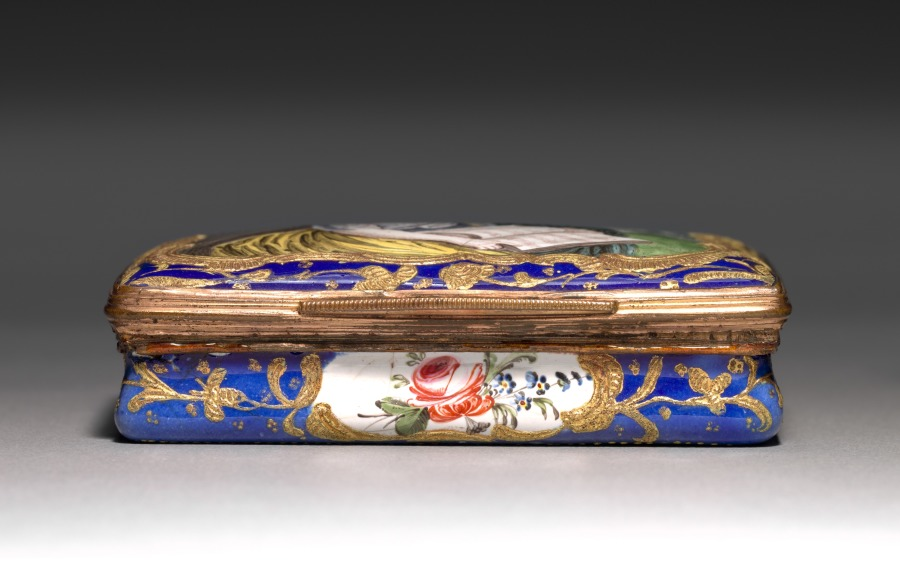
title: Snuff Box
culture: England, South Staffordshire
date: c. 1770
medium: enamel on copper, gilt metal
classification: Miscellaneous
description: Luxurious personal objects, like this snuff box, were an essential part of a privileged wardrobe during the 1700s and early 1800s, emphasizing their owner’s refinement and wealth. Their glittering surfaces, however, disguised a system based on the labor and suffering of enslaved or indentured people, whether in gold or stone mines, tobacco farms, or shops where these goods were made. Like cotton, sugar, and tea, snuff came from British colonies in America, India, and the Caribbean, where enslaved people were exploited to grow these crops under extremely harsh conditions. Slavery was not abolished in much of the British Empire until 1833. Britain and other European nations continued to pursue colonialism with a sense of superiority that found its way into all aspects of life, including decorative objects glorifying their conquests.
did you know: This small, elaborate box held snuff, a form of powdered tobacco that was inhaled in tiny amounts.